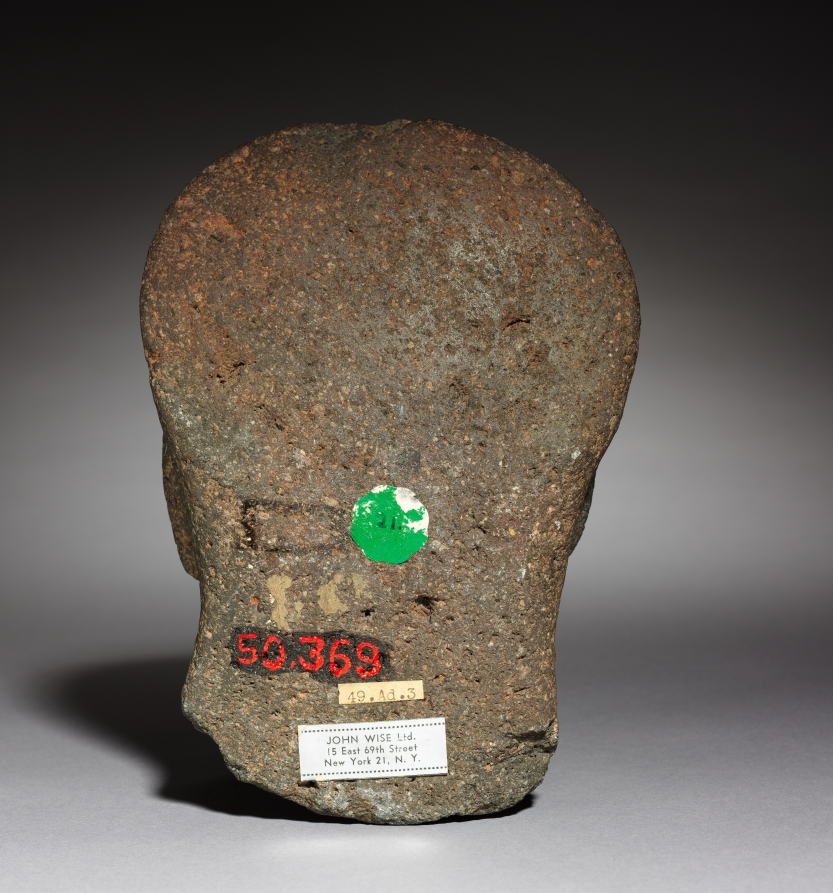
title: Head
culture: Mexico, Classic Veracruz (Totonac or Tajin)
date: 600–1100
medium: stone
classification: Sculpture